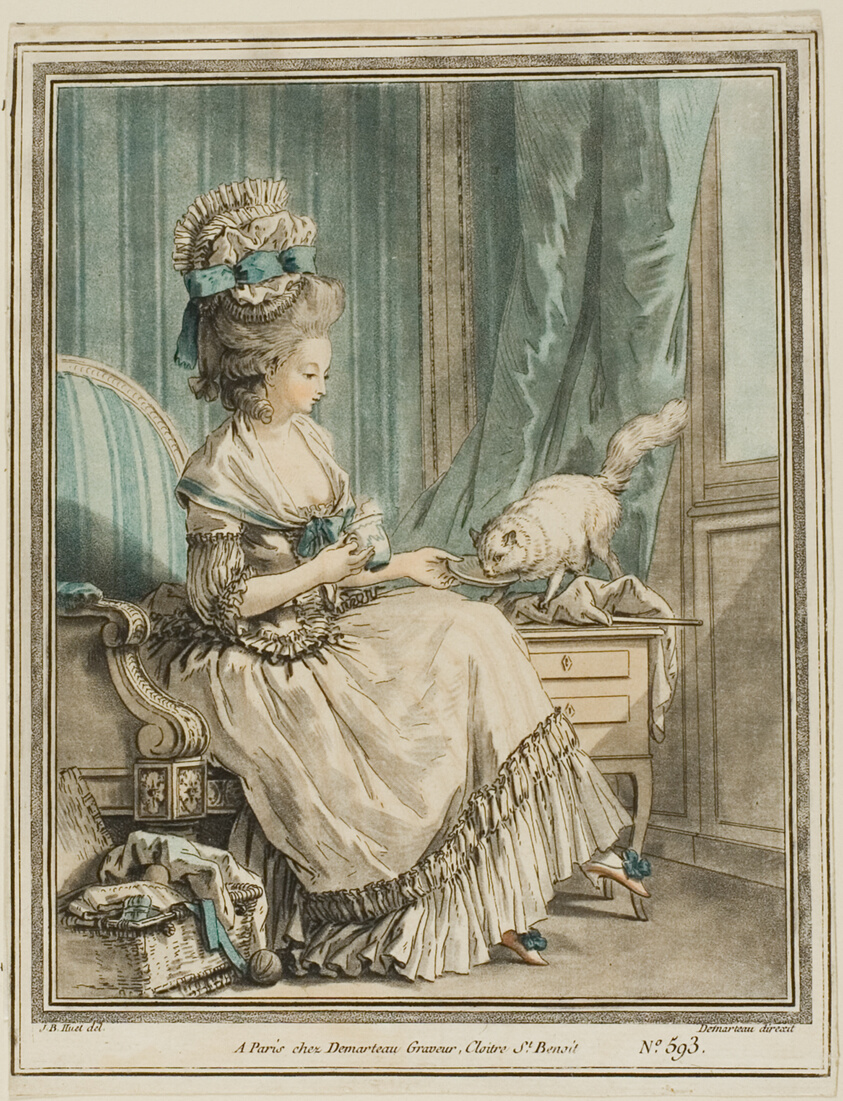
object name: Print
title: The Cat's Repast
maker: Gilles-Antoine Demarteau (French, c. 1750-1802); after Jean-Baptiste Huet (French, 1745-1811)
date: 1778/79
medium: Color crayon-manner engraving, with hand-coloring, on ivory laid paper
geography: France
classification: crayon manner print; engraving; print; prints and drawing